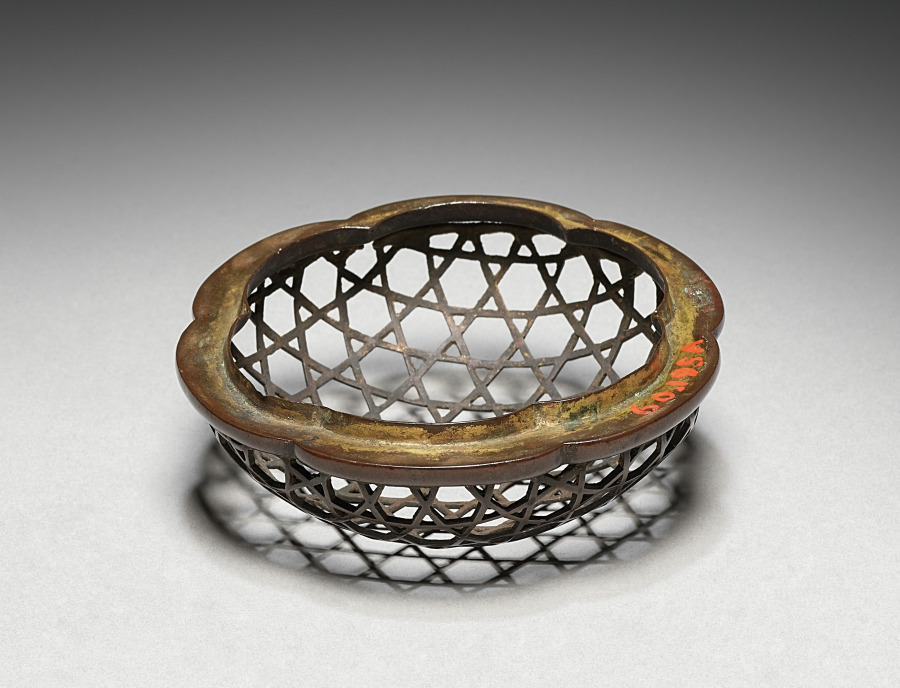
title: Incense Burner (lid)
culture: Japan, Nanbokuchō period (1336–92)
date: late 1300s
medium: bronze with metal rim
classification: Lacquer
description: This container's repeated, undulating, rounded sides evoke waves over which the articulated plovers sweep. The bronze cover (probably a later addition) mimics the design of a fishing weir. Overall, the container brings to mind the seashore. The earthy quality of the lacquered surface demonstrates the interaction between a man-made pattern (the plovers) and the somewhat unexpected surface of a natural material such as wood.